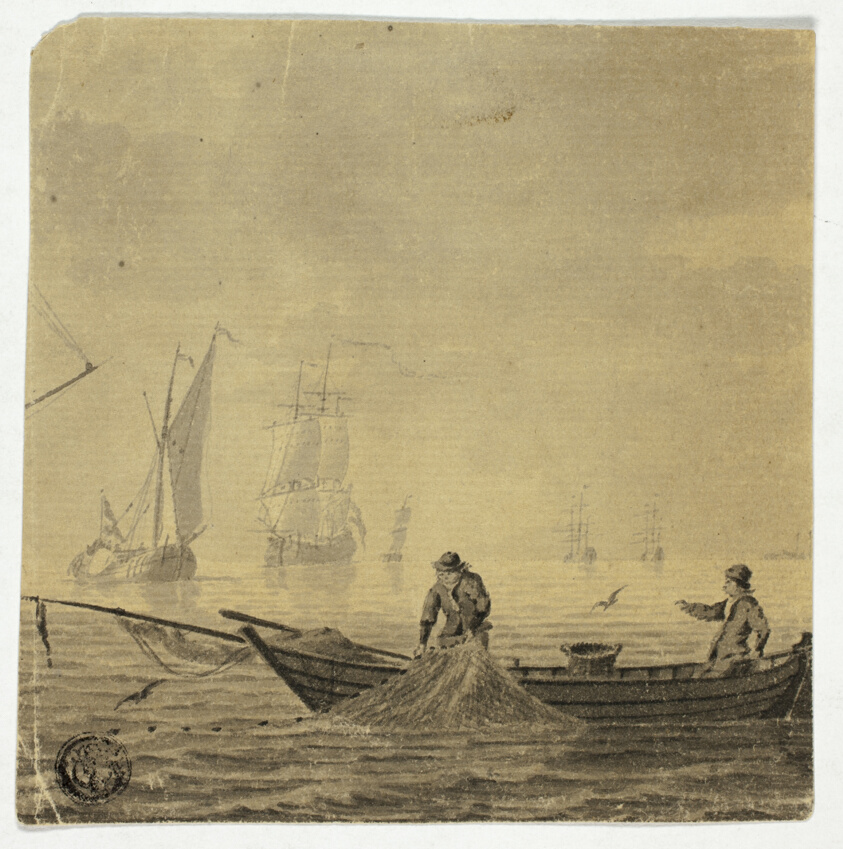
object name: Drawing and Watercolor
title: Fishermen Pulling in Net on a Boat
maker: Cornelis Ouboter van der Grient (Dutch, 1691-1783)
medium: Pen and gray ink, with brush and gray wash, on tan laid paper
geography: Holland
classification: ink or chalk wash; drawings (visual works); prints and drawing